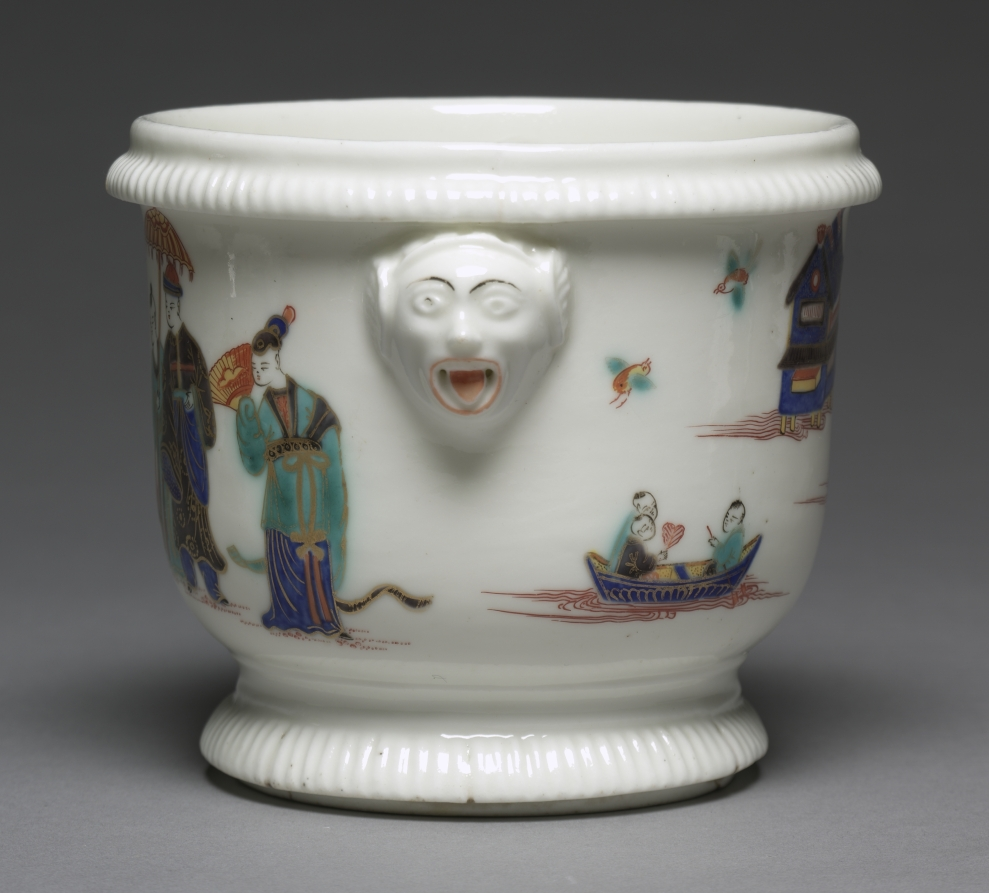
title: Bottle Cooler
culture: France, Saint Cloud, 18th century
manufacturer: Saint Cloud Porcelain Factory (French)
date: c. 1725– 1735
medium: soft-paste porcelain with enamel decoration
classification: Ceramic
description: The form of these cachepots is entirely typical of Saint-Cloud porcelain of about 1725. Their decoration, based upon Chinese porcelains of the so-called "famille-verte" type, is most unusual. Polychromed enamels were not often employed on Saint-Cloud porcelains, and figural scenes are very rare.